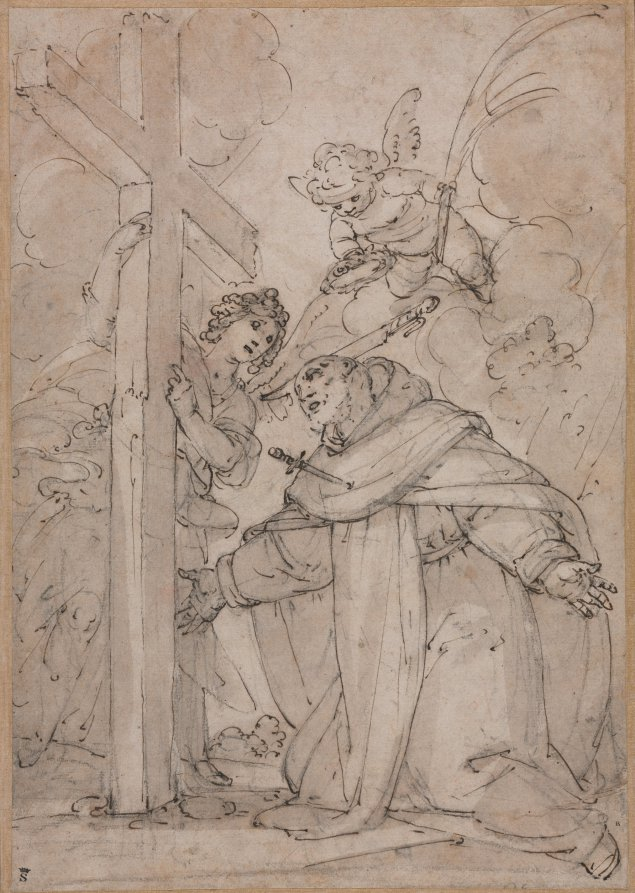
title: Saint Peter Martyr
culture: Italy, 16th century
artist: Giovanni Battista Paggi (Italian, 1554–1627)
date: late 1500s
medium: pen and brown ink and brush and brown wash over black chalk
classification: Drawing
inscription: RECTO OF SECONDARY SUPPORT, lower center, in brown ink: Ippolito Scarsellino . [Scarsellino underlined in graphite] ; lower center, in blue pencil: . 1551 ; lower center, in blue pencil: 1621 . ; lower right, in graphite: - voir au versò - ; VERSO OF SECONDARY SUPPORT, across top, in brown ink: Ippolito Scarsellino [underlined] da Ferrara [Ferrara underlined], figlio di Sigismondo Scarsella [Sigismondo Scarsella underlined] , excellete Disegnatore [illegible]. / morì L'anno 1620 ____ Orlandi [Orlandi underlined]; who, speaking of his Father, in this Article, & of the / fine works he left behind him in his own country of Ferrara [Ferrara underlined] ; says ___ L'opera più / bella che Lasciasse alla sua città fù il figlio Ippolito. [entire Italian phrase underlined]. A good Cavalier Expresion for / a monk! ; upper left, in graphite: 20ºº ; upper center, in blue pencil: # 46 ; upper right, in blue pencil: 20ºº ; upper left, in graphite(?): [illegible] ---- 10 [erased] ; upper left, in graphite: 74 [circled] ; center left, in graphite: 10 [sideways, erased] ; lower left, in graphite: OK-P . / 2 of Ma[r?] '61